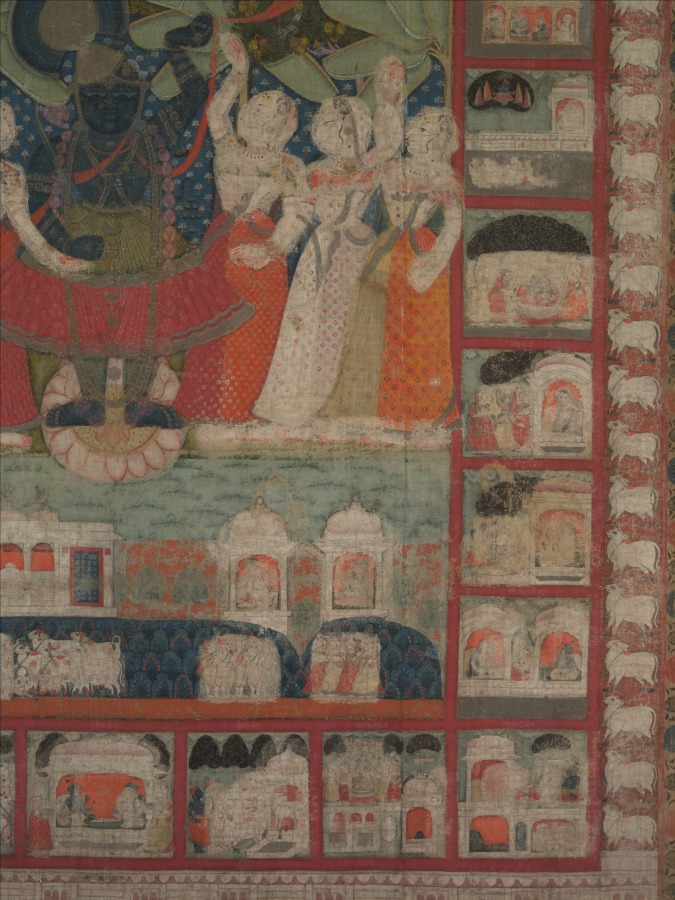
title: Pichvai of Shri Nathji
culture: Northwestern India, Rajasthan, Nathdwara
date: 1825–50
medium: Gum tempera, silver, and gold on cotton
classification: Painting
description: Painted-cloth devotional wall hangings (pichvai) form the backdrop to the worship of Krishna as Shri Nathji. As a result of long-term exposure, these textiles are usually faded and worn. The icon of Krishna as Shri Nathji is the central figure. On either side of him, milkmaids with arms entwined join him in a state of ecstasy. Experiencing the bliss of divine play (lila) with Krishna is the main religious goal for followers of the Pushti Marg sect of Hinduism to which this work belongs. Episodes from the life of Krishna and a border of adoring cows frame the central scene.